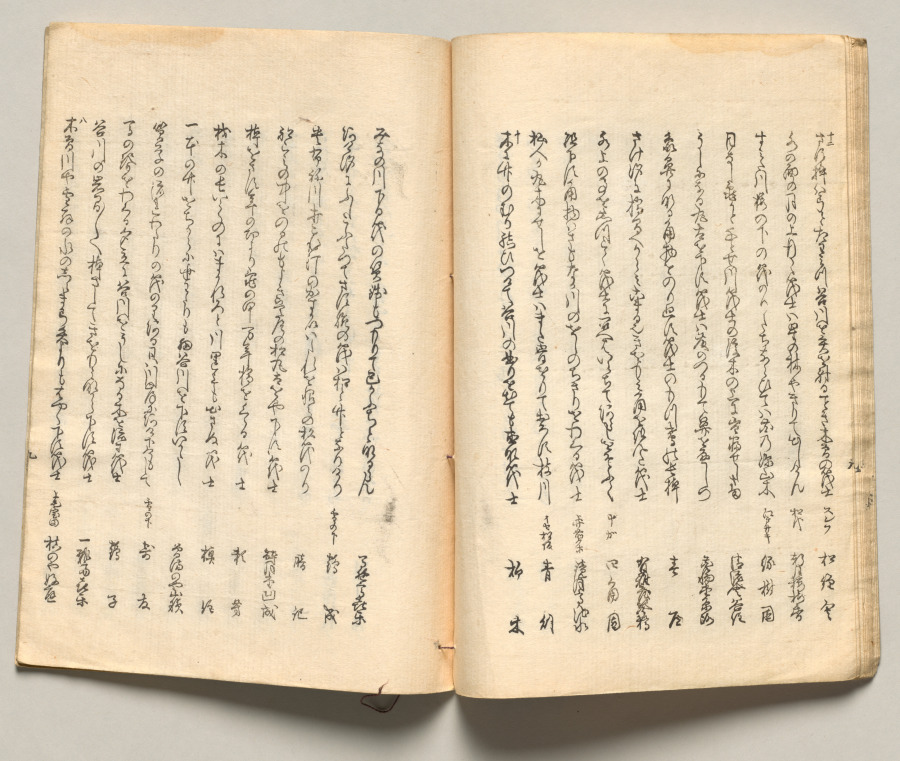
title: Spread Sixteen from Volume Five of People of Japan in Light Verse (Kyōka)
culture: Japan, Edo period (1615–1868)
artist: Utagawa Hiroshige (Japanese, 1797–1858)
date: 1857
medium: Woodblock-printed book; ink and color on paper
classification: Bound Volume